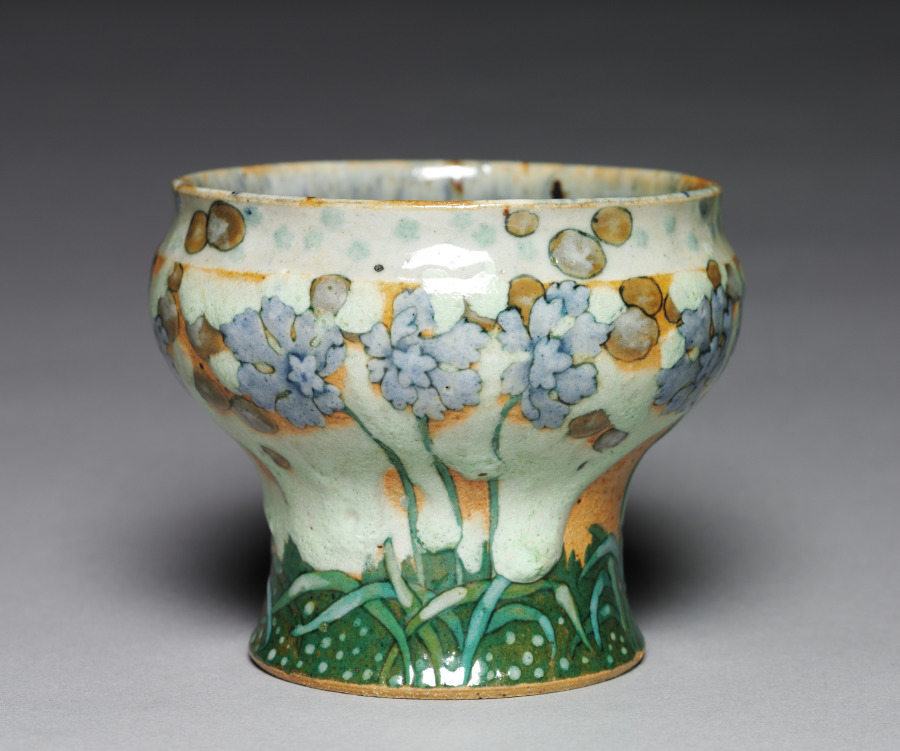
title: Bowl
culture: France, 19th century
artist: Albert Louis Dammouse (French)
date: c. 1900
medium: stoneware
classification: Ceramic